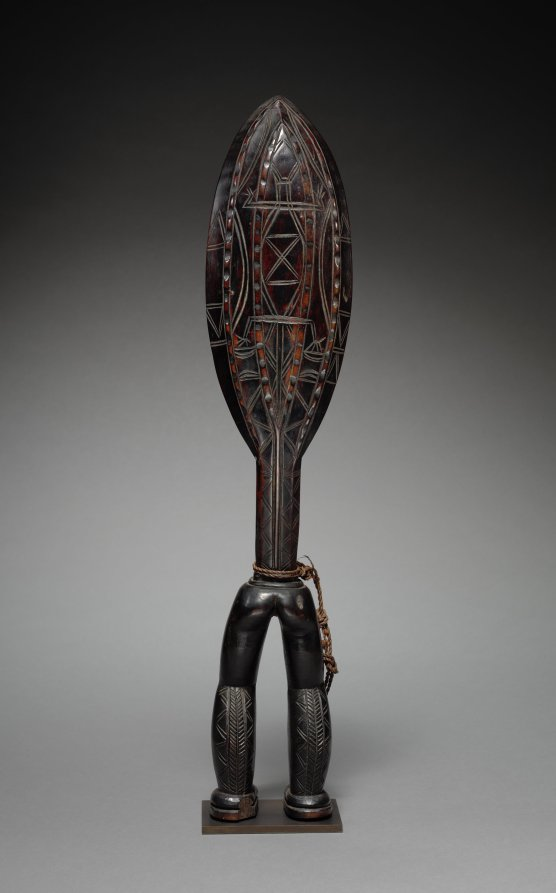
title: Ceremonial Ladle (Wunkirmian or Wakemia)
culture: Africa, West Africa, Côte d'Ivoire, Dan-style carver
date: possibly late 1800s or early 1900s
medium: Wood, twine, and possibly resin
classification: Sculpture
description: An emblem of great prestige, this human-shaped ladle would have been owned by a distinguished married woman recognized for her talents as a farmer and her exceptional generosity and hospitality. One of her responsibilities was to host a grand Feast of Merit when she, along with other highly respected women, prepared food for a large number of local and foreign guests. During the feast the women danced brandishing their rice-filled ladles while singing in strident voices.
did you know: This ladle was a status symbol for a notable woman.